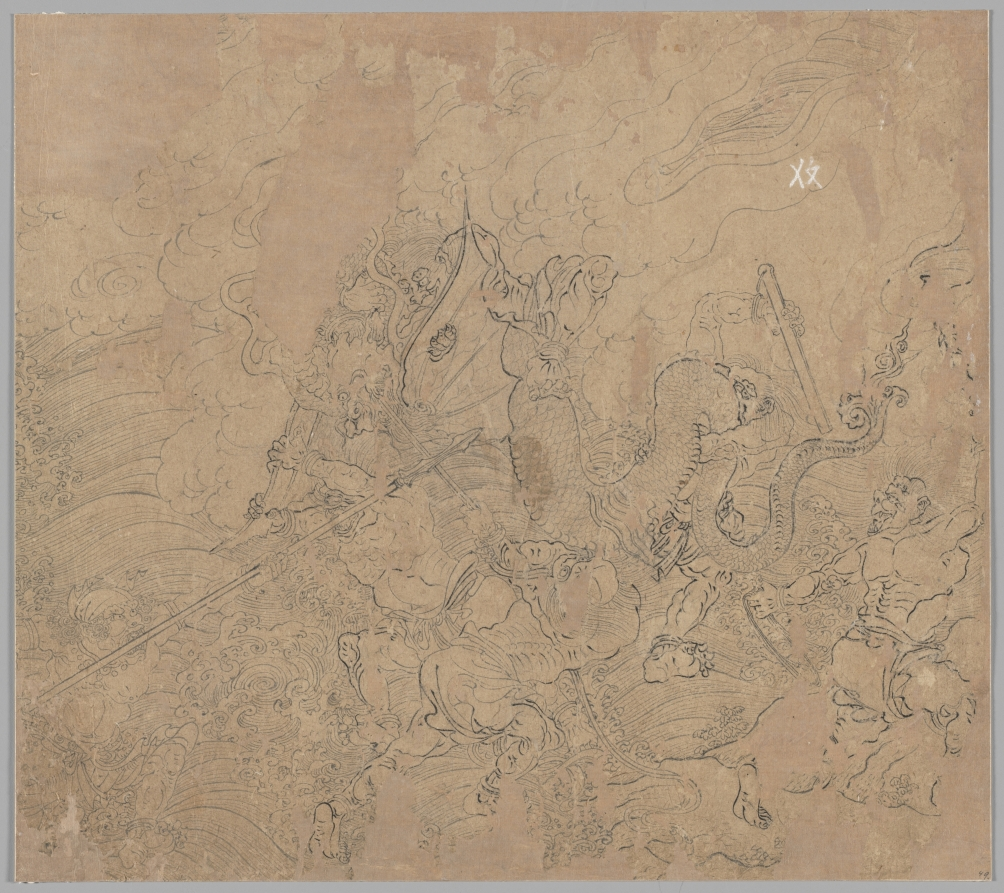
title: Album of Daoist and Buddhist Themes: Search the Mountain: Leaf 49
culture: China, Southern Song dynasty (1127-1279)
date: 1200s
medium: Album, ink on paper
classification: Painting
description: This extraordinary album has 50 paintings on a variety of religious subjects. They were likely created by several master craftsmen to share with studio apprentices as models for fulfilling commissions. The Jade Emperor and the Daoist pantheon make up the first 26 leaves. The next 14 leaves portray the Buddhist Ten Kings of Hell administering punishments to the dead. The third section, called “Clearing the Mountains,” features divine soldiers, led presumably by the deity Erlang Shen 二郎神, fighting undesirable creatures.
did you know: Demon-soldiers attack and chain a vicious, rearing dragon amid splashing waves.